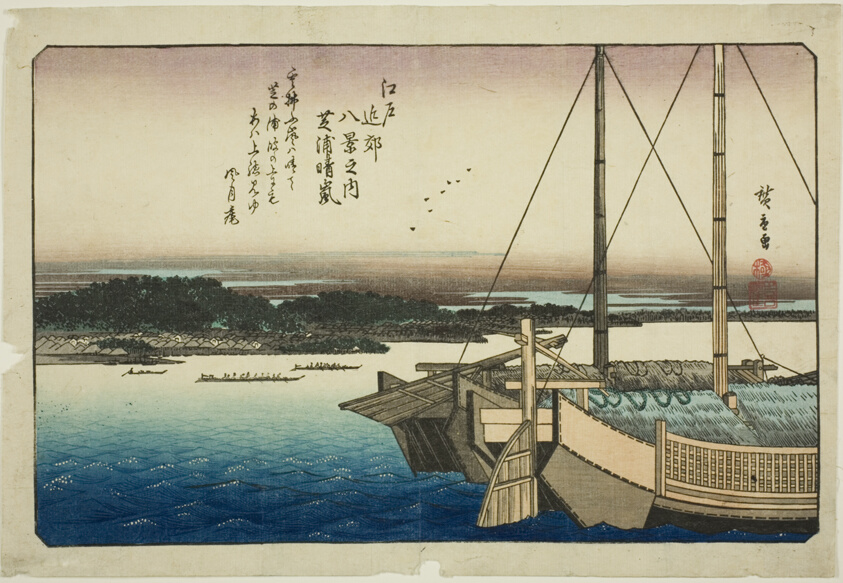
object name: Print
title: Clearing Weather at Shibaura (Shibaura seiran), from the series "Eight Views in the Environs of Edo (Edo kinko hakkei no uchi)"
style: Japanese (culture or style)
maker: Utagawa Hiroshige 歌川 広重; Japanese, 1797-1858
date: c. 1837/38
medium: Color woodblock print; oban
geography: Japan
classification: woodblock print; print; asian art